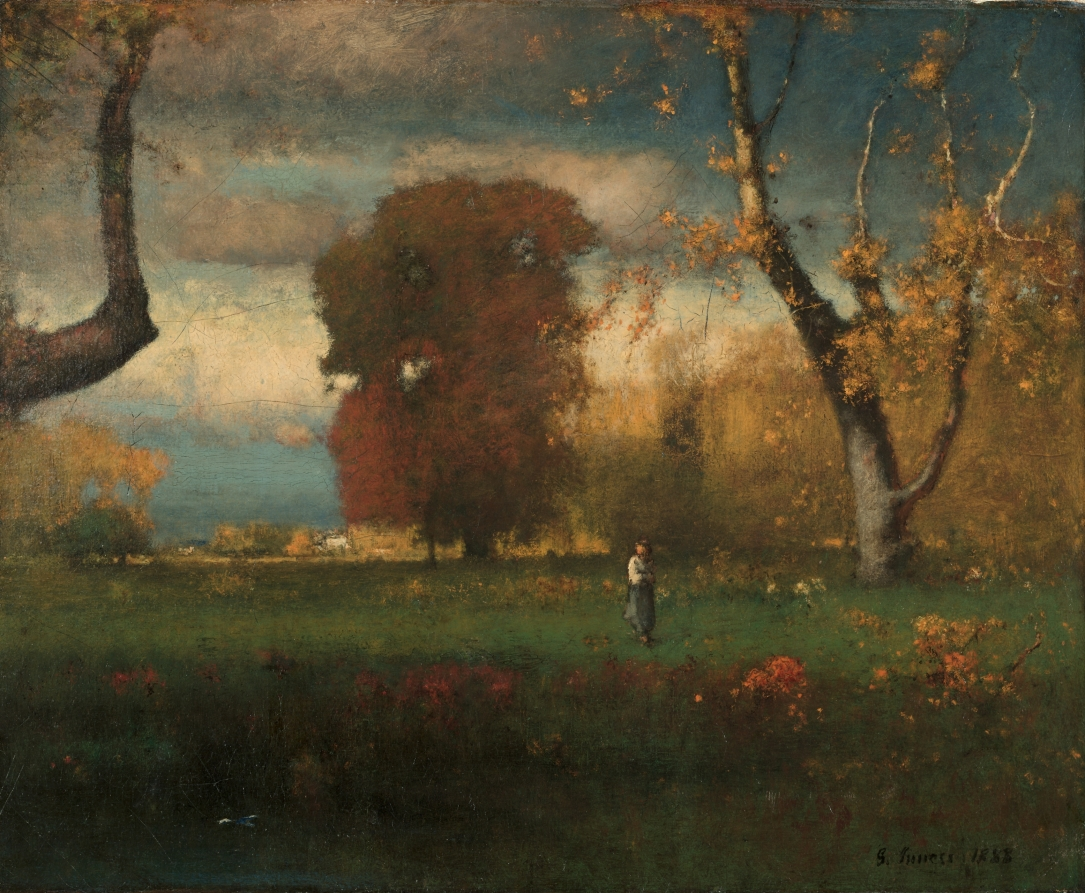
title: Landscape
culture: America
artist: George Inness (American, 1825–1894)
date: 1888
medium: oil on canvas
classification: Painting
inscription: signed lower right: G. Inness 1888